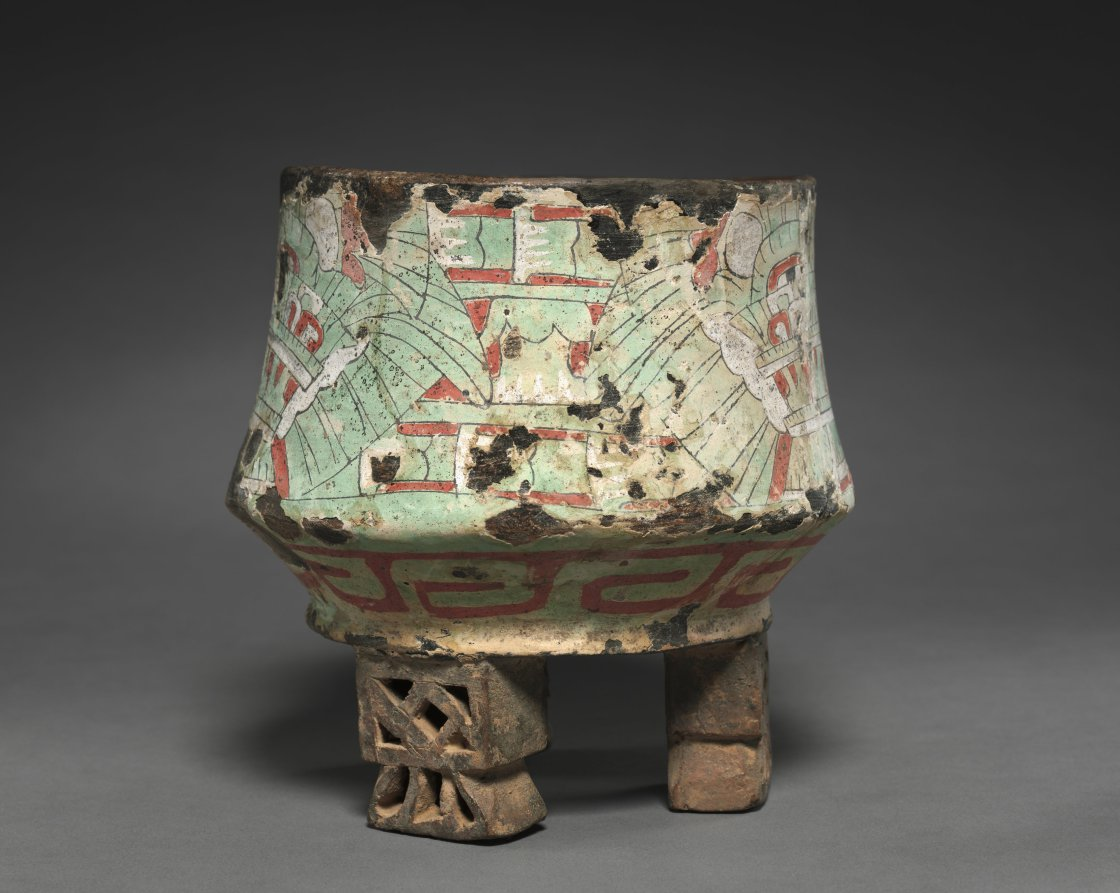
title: Vessel with Butterfly Headdress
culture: Central Mexico, Teotihuacán, Classic period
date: 1–550 CE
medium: ceramic, stucco, pigment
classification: Ceramic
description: The headdress shown on this vessel combines a serpent's mouth with a butterfly's proboscis (feeding tube), which curls between the eyes. The butterfly often appears in the headdress of the Great Goddess, an extremely important Teotihuacán deity. Stucco (paper-thin, painted plaster) is fragile and usually does not survive well; the stucco of the basin in this case has been repaired.